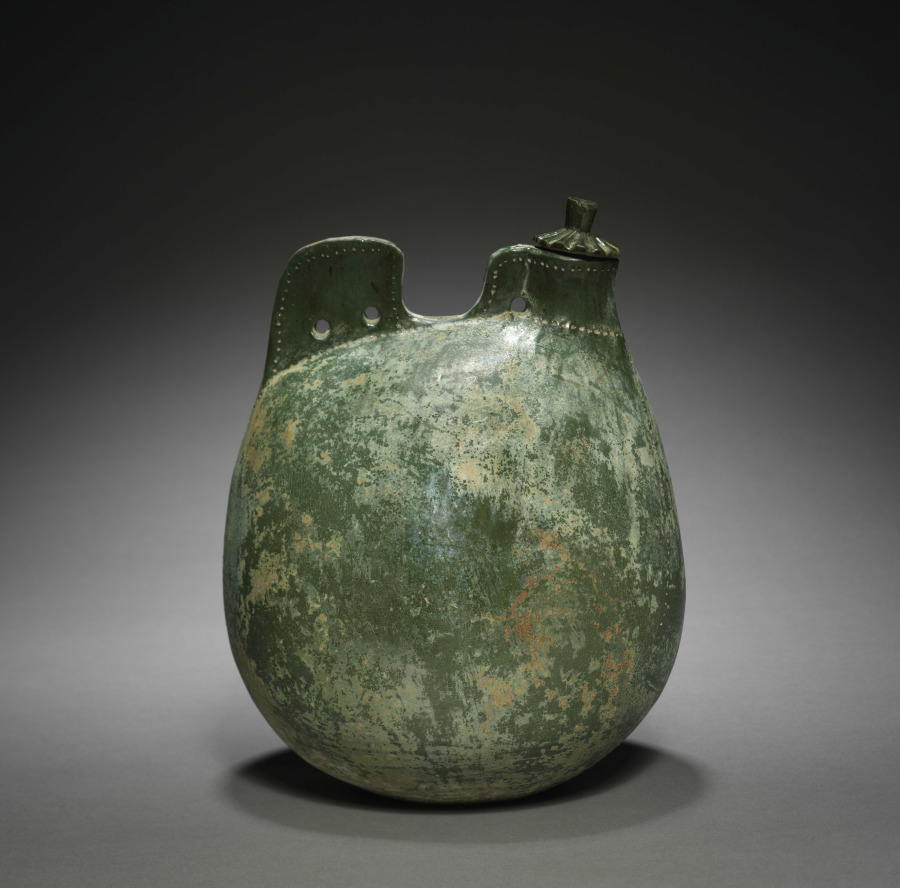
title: Leather Bag-Shaped Flask with Cover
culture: Northeast China, Liao dynasty (916-1125)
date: 916–1125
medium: earthenware with green glaze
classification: Ceramic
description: Flasks like these derive their shapes from leather bags; even the edges are finely rouletted to resemble the seams of sewn leather. These were used by the nomadic Khitan people who established the Liao kingdom in Inner Mongolia, Manchuria, and North China. Such wares represented the Liao adoption of the Tang Chinese ceramic tradition, and yet they expressed ethnic identity and new innovations resulted from the cultural borrowing.